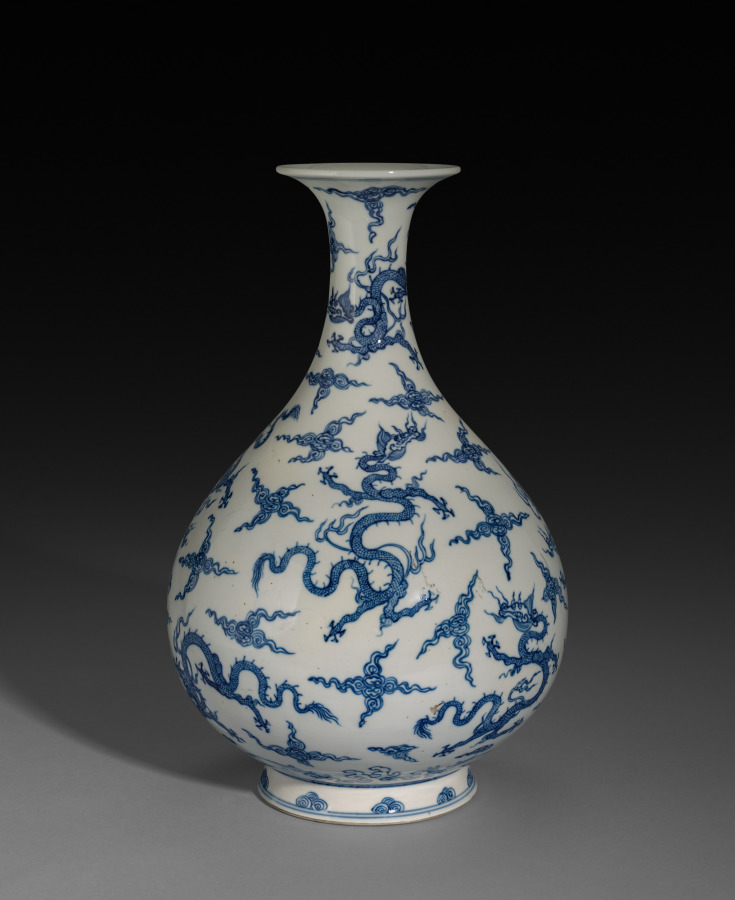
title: Bottle Vase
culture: China, Jiangxi province, Jingdezhen kilns, Qing dynasty (1644-1911), Yongzheng reign (1723-35)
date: 1723–35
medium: porcelain with underglaze blue decoration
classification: Ceramic